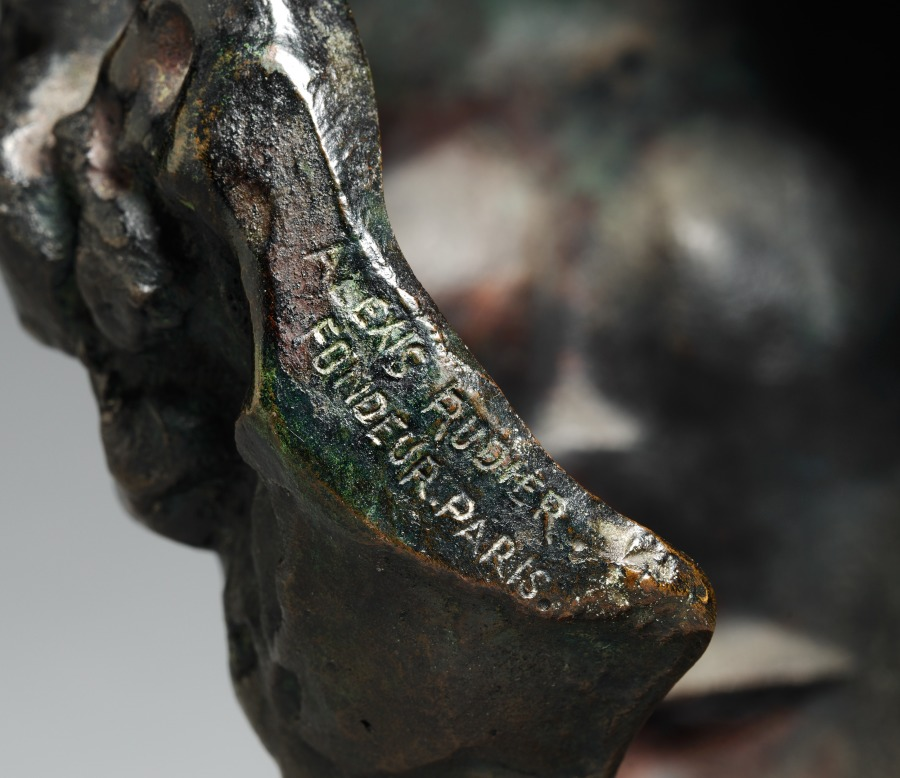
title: Mask of Séverine (Caroline Rémy)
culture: France, 19th century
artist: Auguste Rodin (French, 1840–1917)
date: 1893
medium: bronze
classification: Sculpture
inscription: Signed sinister side of neck: "A. Rodin"; inside dexter side in relief: "A. Rodin"